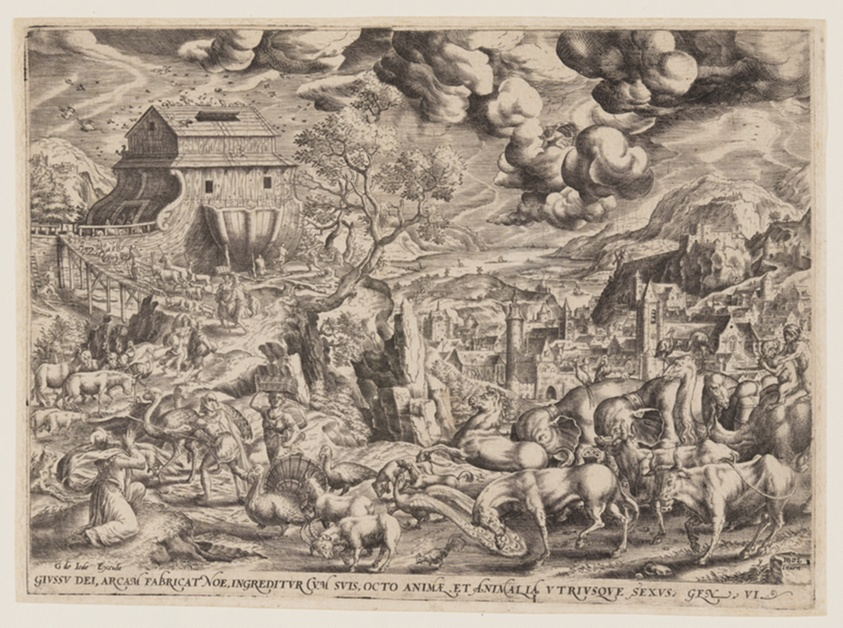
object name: Print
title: The Pairs of Animals Entering the Ark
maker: After Hans Bol; Flemish, 1534–1593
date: c. 1570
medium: Engraving on ivory laid paper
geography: Flanders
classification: engraving; paper; print; prints and drawing